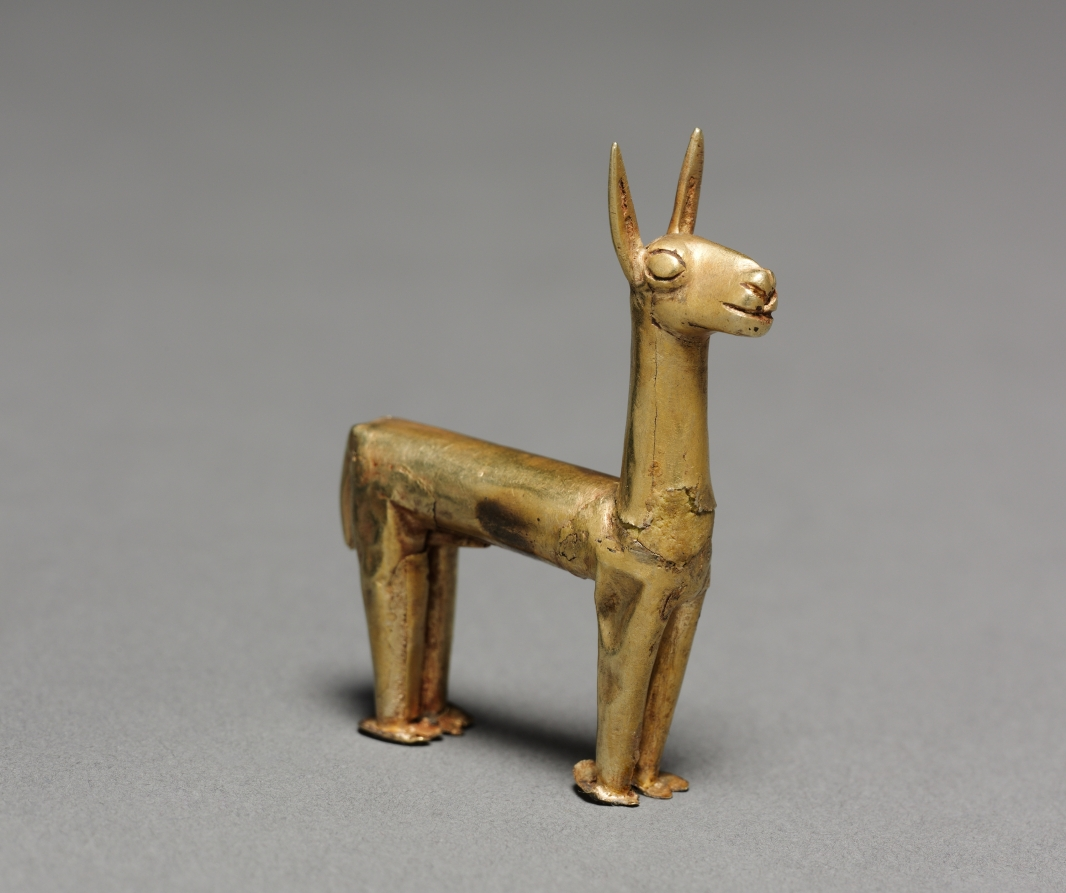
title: Llama Figurine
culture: Peru, Bolivia, Chile or Ecuador, Inka style (1400-1532)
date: 1400–1532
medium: hammered gold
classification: Metalwork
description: Precious metal was a major Inka artistic medium, but most was melted down after the conquest to fund the Spanish court. The sole remains are small-scale objects from tombs and offerings. Figurines in gold, like this one, have been found at shrines on sacred mountain peaks, where they accompanied child sacrifices in offerings made during times of crisis, such as famine.